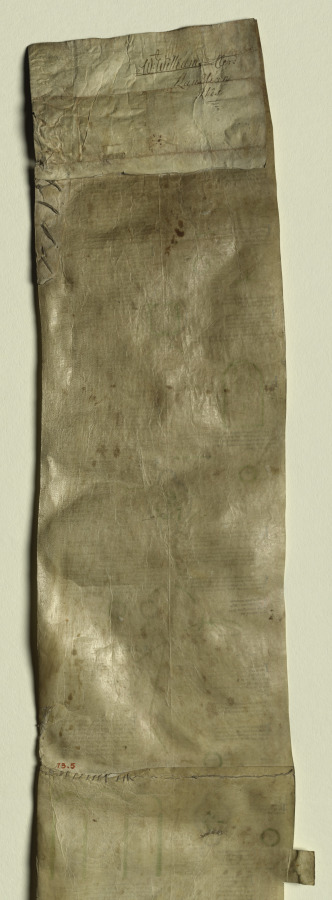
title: Peter of Poitiers's "Compendium Historiae in Genealogia Christi"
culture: England, Canterbury, 13th century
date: c. 1220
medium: ink and tempera on a vellum roll of four membranes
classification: Manuscript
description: This manuscript roll, composed of four membranes formerly stitched together in a continuous roll about nine feet long, has been divided in the middle for easier visibility and study. The text is an abridgment of biblical history focused on the descent of Christ from Adam. It was written by Peter of Poitiers (about 1130–1205), who taught theology and history in Paris and was widely copied. The present roll is an English copy of Peter's text made shortly after his death. Although manuscript rolls were hung on the walls of a classroom as instructional aids to students, some of them have value beyond their textual and historical interest because of the fine quality of their drawings, as seen here. A comparison with Canterbury manuscripts and stained glass of around 1220 is the basis for the attribution to Canterbury. Peter of Poitiers's aim in this project was to assist students prevented from mastering biblical history because of its length and because they were too poor to own books. His text on roll is the briefest possible summary of biblical history. It is arranged in six historical stages, denoting the six ages of the world, as decreed by theological tradition. The first five ages were inaugurated by Old Testament individuals: Adam, Noah, Abraham, David, and Sedecias. The birth of Christ heralded the sixth stage. Beginning at the top of the first membrane, the text consists of brief biographical entries on the ancestors of Christ (Adam, Noah, Abraham, Moses, and David) and other biblical personalities. These extend to the birth of Christ on the fourth membrane, ending with accounts of Hebrew and Roman kings and the Apostles. Each compendium shows the names of the ancestors inscribed within circles, those of direct descent placed vertically in a central column, others scattered in clusters to the right and left. The decoration of the roll consists of a series of medallions of diverse geometrical frames filled with either a figural drawing or a diagram. The style of these pen-and-ink drawings, some illuminated in tempera or tinted with wash, stems from English manuscript and glass painting attributed to the school of Canterbury Cathedral. The style of the museum's illustrations is so close to the stained glass panels made for Trinity Chapel at Canterbury (about 1220) to suggest that an artist active as a glazier in the Cathedral workshop may also have executed the manuscript. In the least, the painter of the roll manuscript was familiar with the style of the painted glass, and on this basis, a date of about 1220 seems appropriate. Additional evidence is supplied by a psalter illuminated at Canterbury shortly before 1220. The figurative scenes in this psalter were apparently illustrated by the same hand that executed the line and wash drawings in the museum's roll.